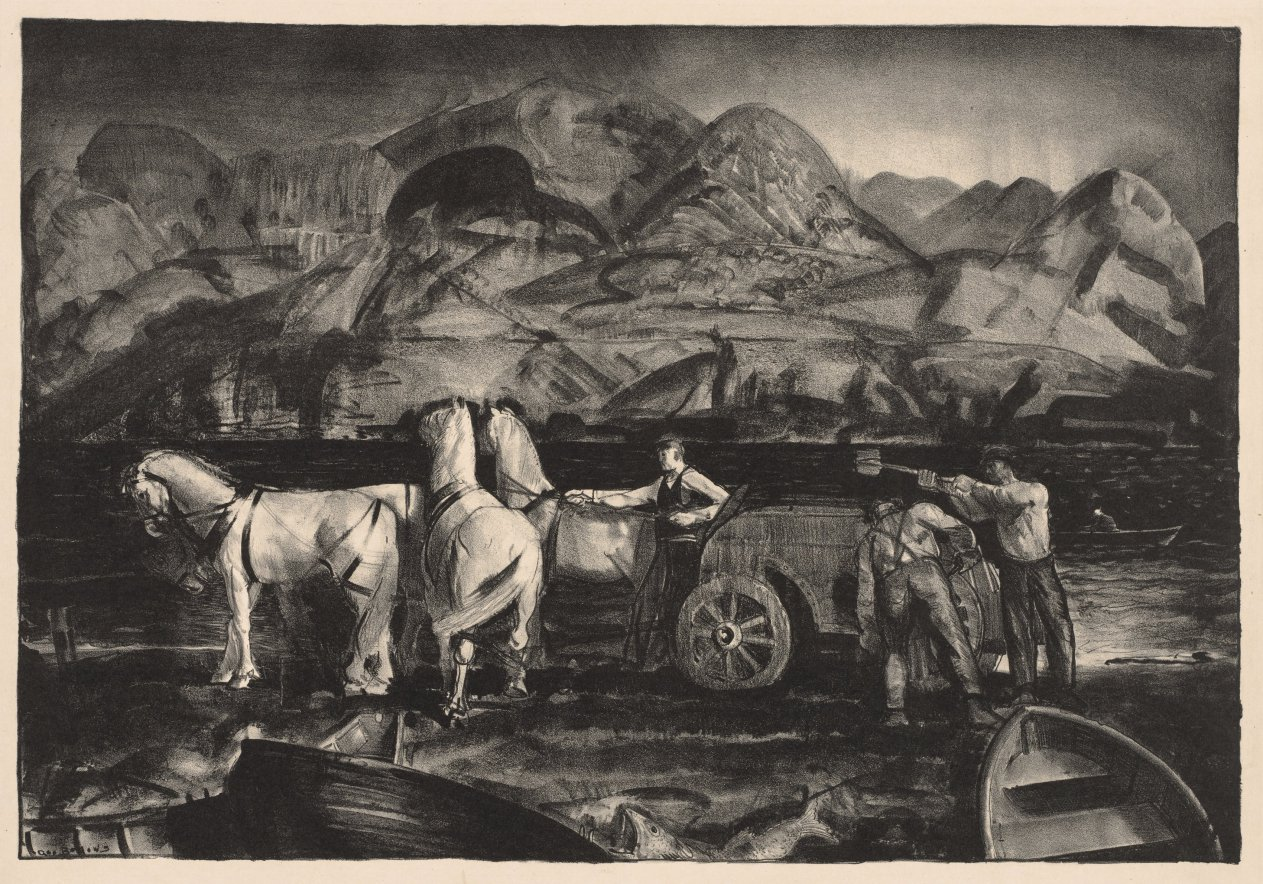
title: The Sand Team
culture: America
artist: George Bellows (American, 1882–1925)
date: 1919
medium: lithograph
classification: Print